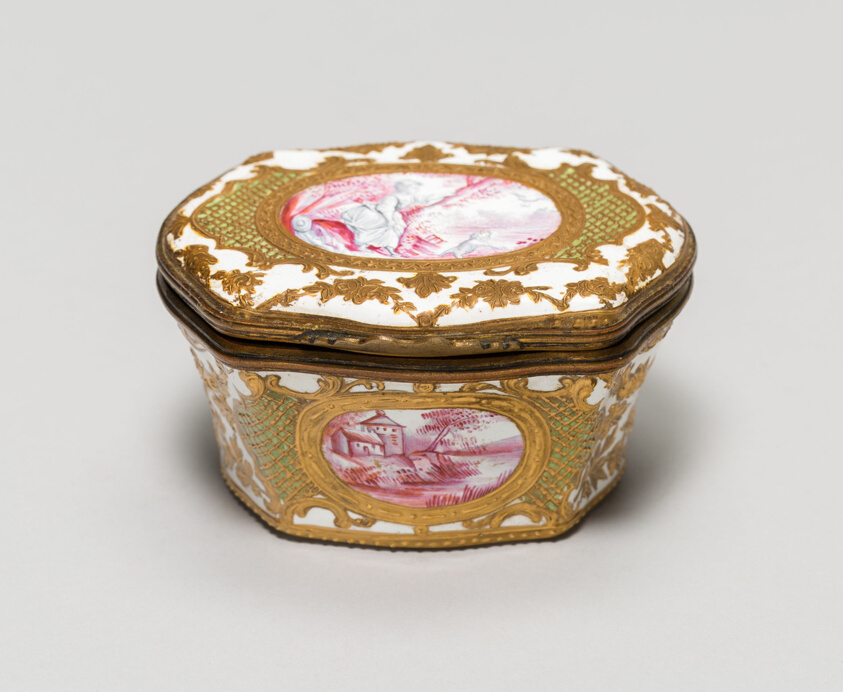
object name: Metalwork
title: Oval Box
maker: Bilston, England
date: c. 1780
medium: Metal and enamel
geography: Bilston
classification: enamel; metalwork